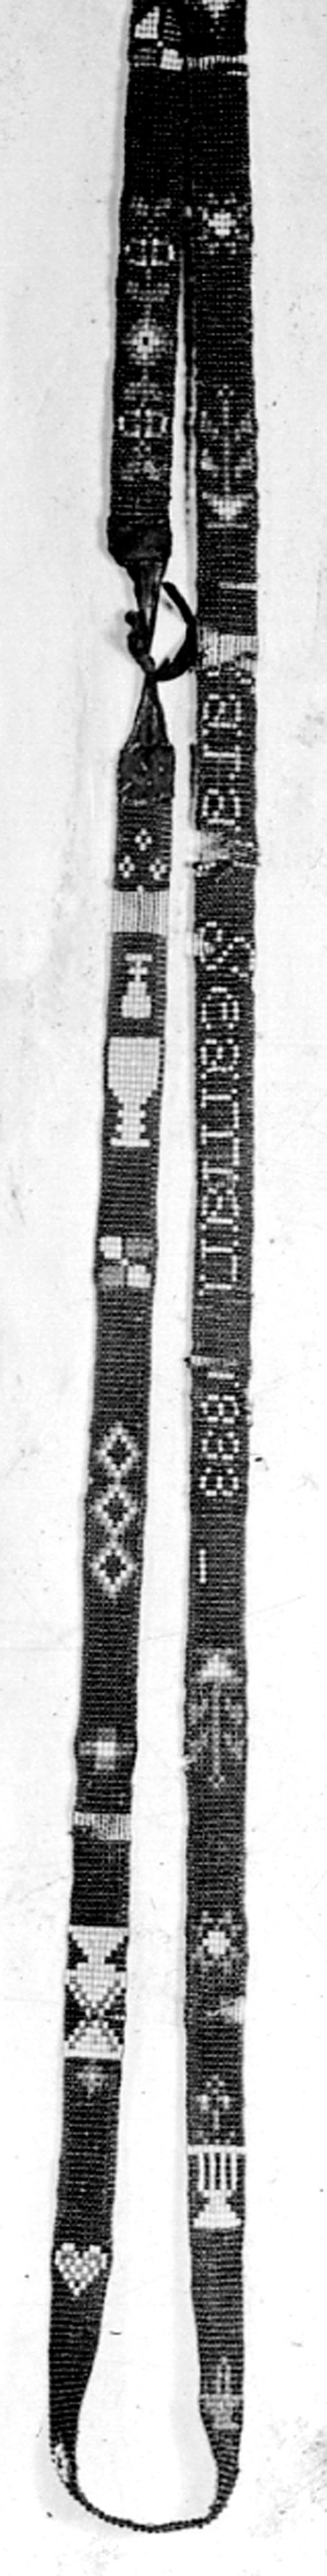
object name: Textile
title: Band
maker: United States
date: 1833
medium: Round glass beads, opaque and transparent, worked between taut vertical threads, 2 horizontal (or wefts) through each bead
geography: United States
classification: textile; needlework (visual works)